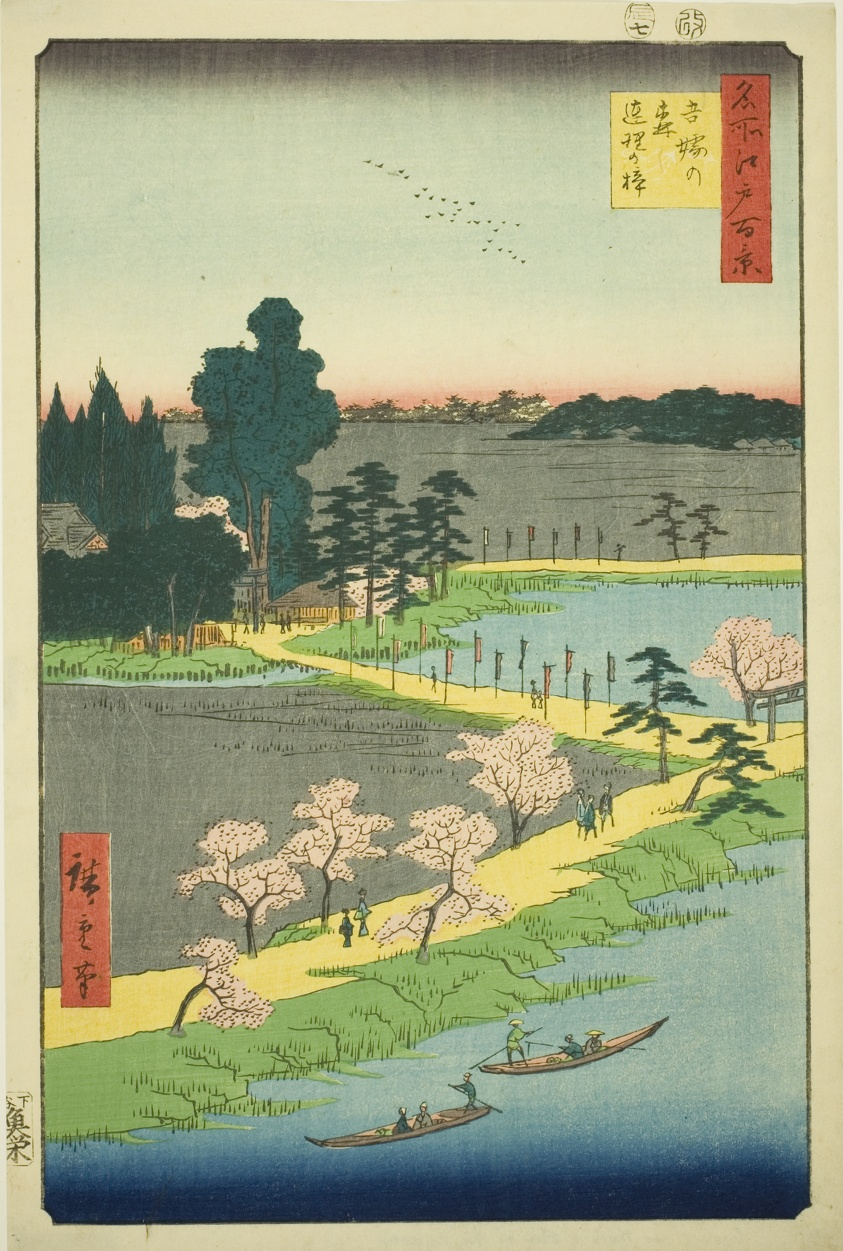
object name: Print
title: The Entwined Camphor Trees at Azuma Shrine (Azuma no mori Renri no azusa), from the series "One Hundred Famous Views of Edo (Meisho Edo hyakkei)"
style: Japanese (culture or style)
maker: Utagawa Hiroshige 歌川 広重; Japanese, 1797-1858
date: 1856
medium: Color woodblock print; oban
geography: Japan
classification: woodblock print; print; asian art